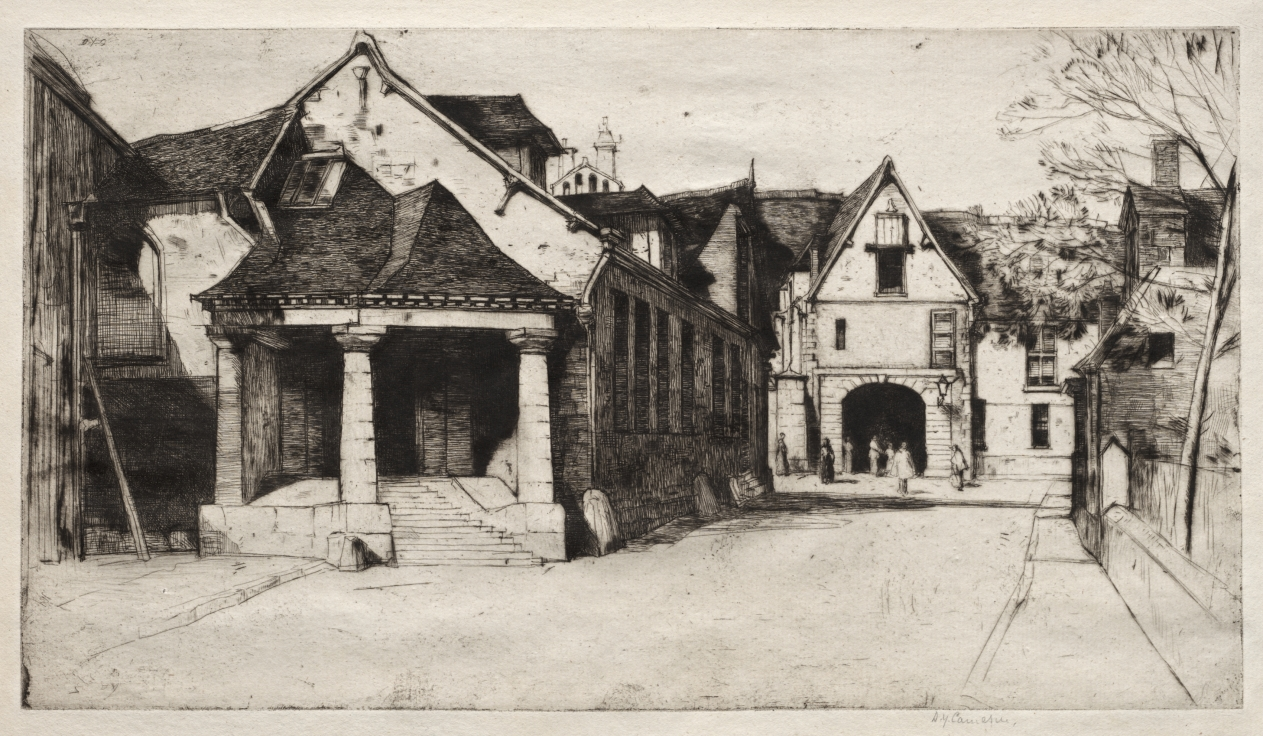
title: Old Museum, Beauvais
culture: England, 20th century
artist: David Young Cameron (British, 1865–1945)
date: 1917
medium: etching and drypoint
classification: Print